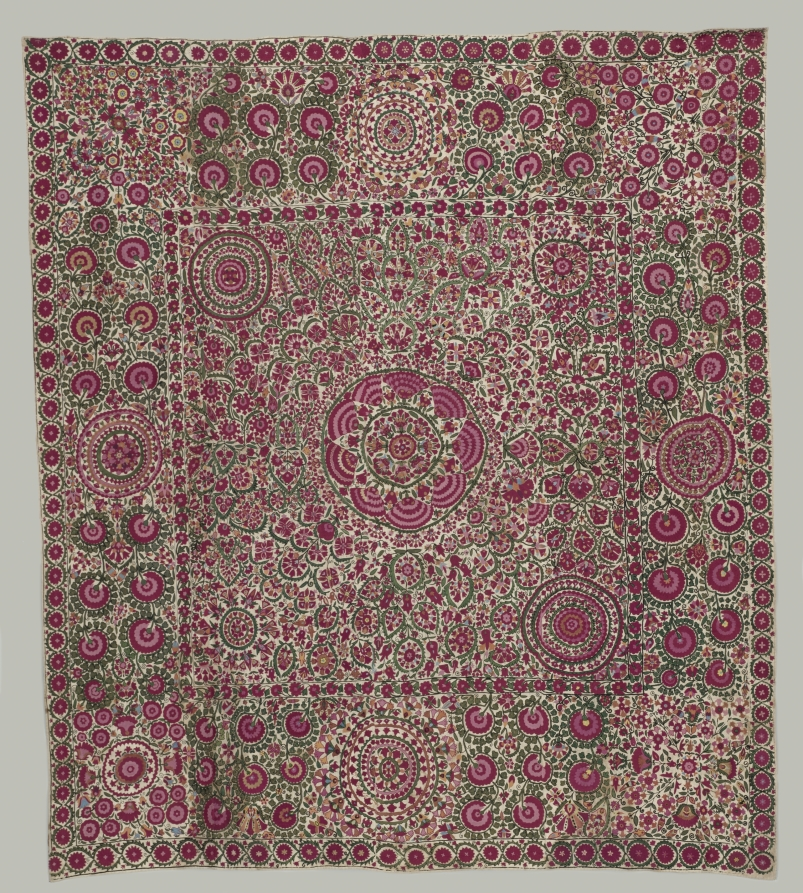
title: Curtain or bedcover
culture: Tajikistan, Ura Tube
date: early 1800s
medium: plain weave: cotton; embroidery: silk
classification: Embroidery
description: Known as suzani, embroideries with elaborate floral decoration from Central Asia were a significant part of a bride’s dowry and were ceremoniously displayed on special occasions. Women embroidered suzani, mothers passing their skills on to their daughters. Floral and foliate motifs generally dominate, emboldened with several shades of red and multiple borders, perhaps conveying cosmological, medicinal, or fertility associations. However, few display a more bountiful blossoming garden than seen here. Flora radiates from the central fanlike bouquet, a design echoed in the corners of the field and in the wide border, characteristic of work from Bukhara, Uzbekistan. Patterns were drawn on several loosely joined cotton cloths and then embroidered in chain stitch.